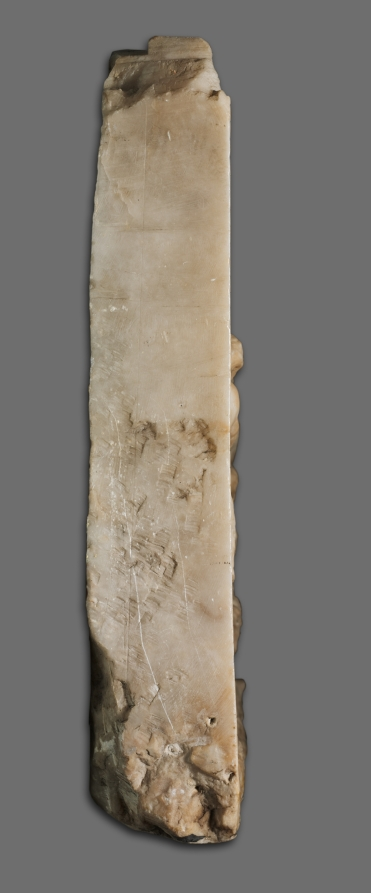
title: Christ Carrying the Cross with Saints Simon and Veronica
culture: South Netherlands, Hainault, 16th century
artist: workshop of Jacques Dubroeucq (Netherlandish, 1500/10–1584)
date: c. 1545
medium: alabaster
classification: Sculpture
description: As Christ dragged his cross through the streets of Jerusalem, Veronica wiped sweat from Christ’s face, which was miraculously imprinted on the fabric. This relief probably came from a choir screen, a barrier between the altar and the congregation, common in medieval churches. Yet the sculpture is more classical than medieval. The artist, yet to be identified, clearly knew the work of Dubreoucq, an artist who brought a taste for Italian Renaissance sculpture to northern France and present-day Belgium. The use of alabaster instead of marble exploits a material local to this part of Europe.